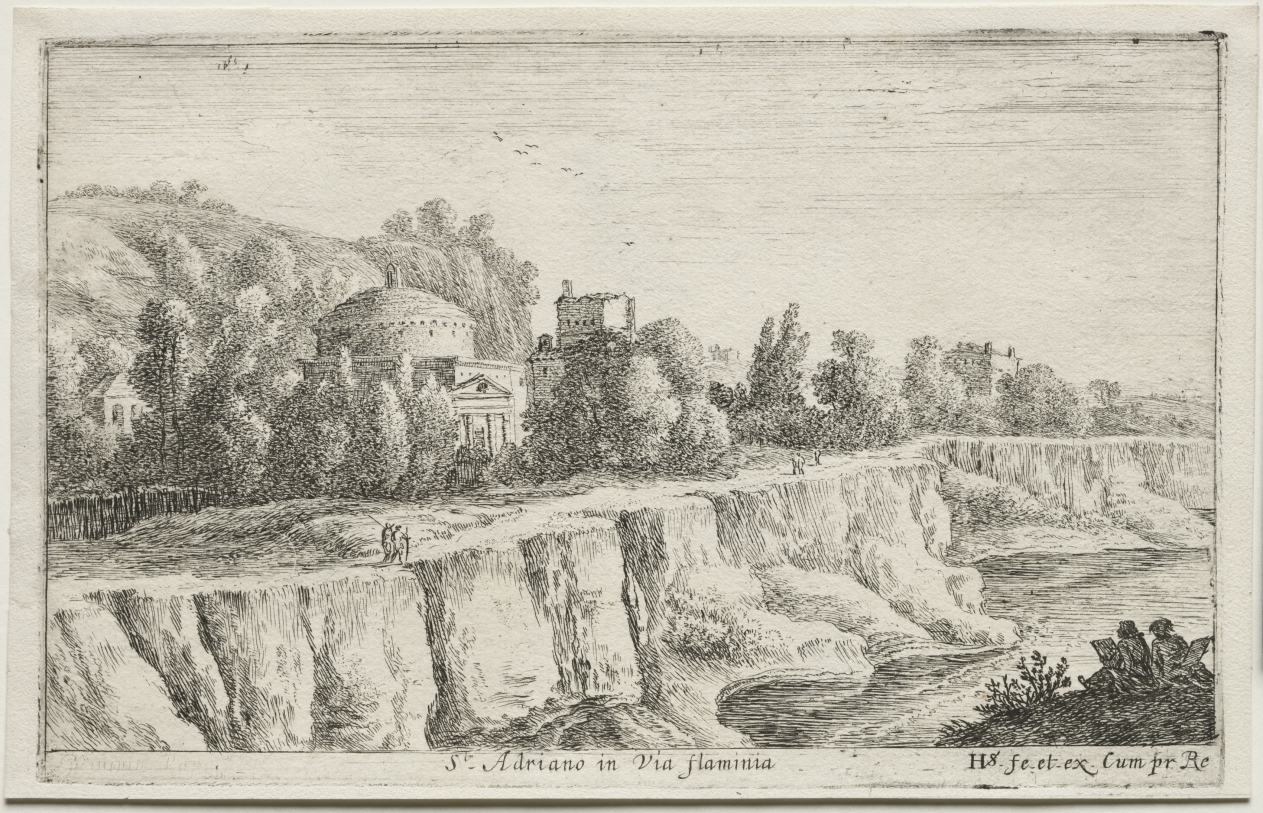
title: Diverse Views in and around Rome: St. Adriano in Via Flaminia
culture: Netherlands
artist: Herman van Swanevelt (Dutch, c. 1600–1655)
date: 1653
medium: etching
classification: Print